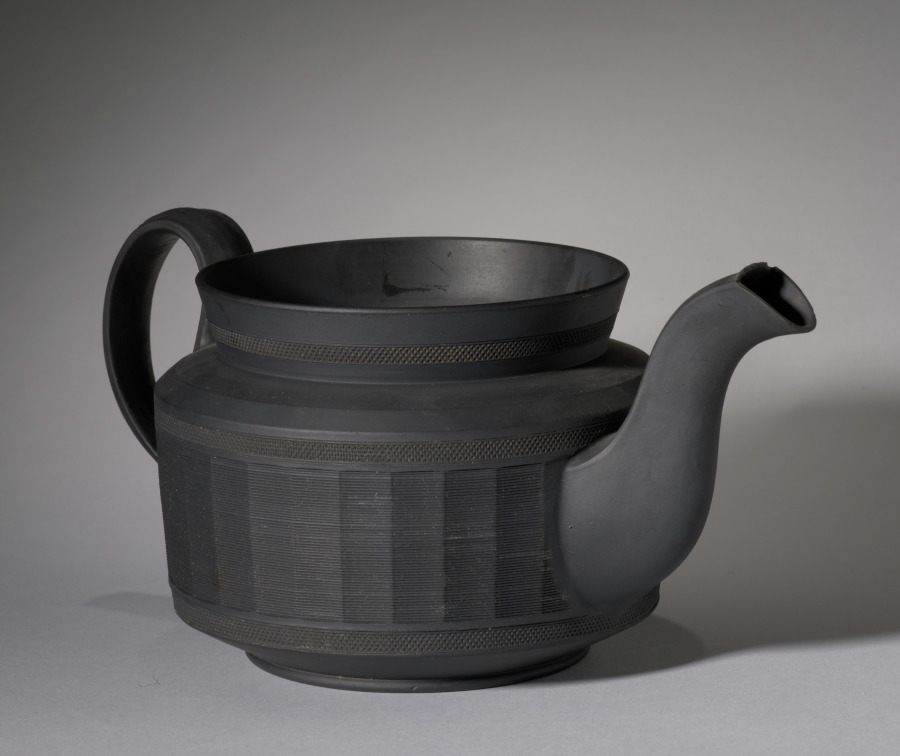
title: Teapot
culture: England, Staffordshire, 19th century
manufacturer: Davenport Pottery and Porcelain Factory (British)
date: 1800s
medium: black basalt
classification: Ceramic